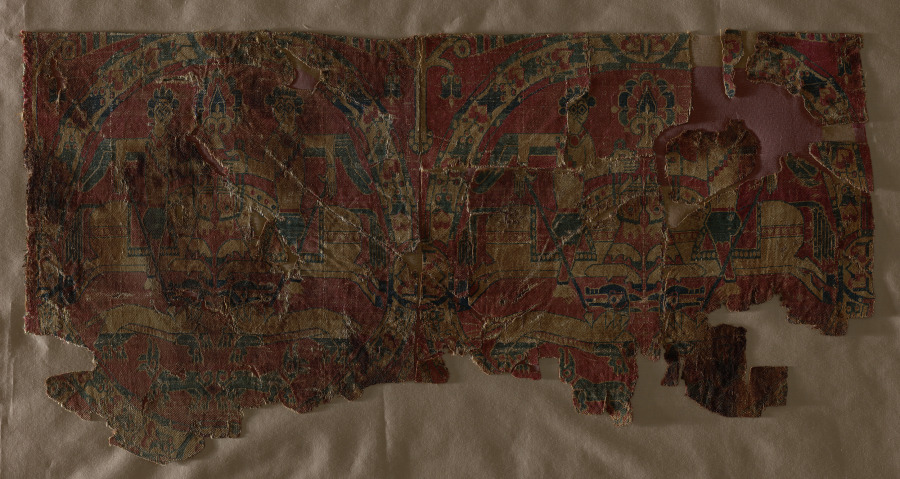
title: Roundels with Hunters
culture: Eastern Iran or Central Asia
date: 800s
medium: Silk: samite weave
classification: Textile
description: This textile consists of two fragments mounted together. They are woven with floral roundels that enclose horsemen hunting lions. The theme of riders hunting with lances, the floral frames of the roundels, and the costumes of the hunters were all inspired by silks from the Byzantine world. The stiff, abstracted style, however, is characteristic of Sogdian silks, woven in Sogdiana in Central Asia and often traded to distant markets. These fragments were preserved in a grave in Egypt where they were found sewn as ornaments onto a tunic.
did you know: The two roundels have different diameters, even though the number of warps per repeat is the same.